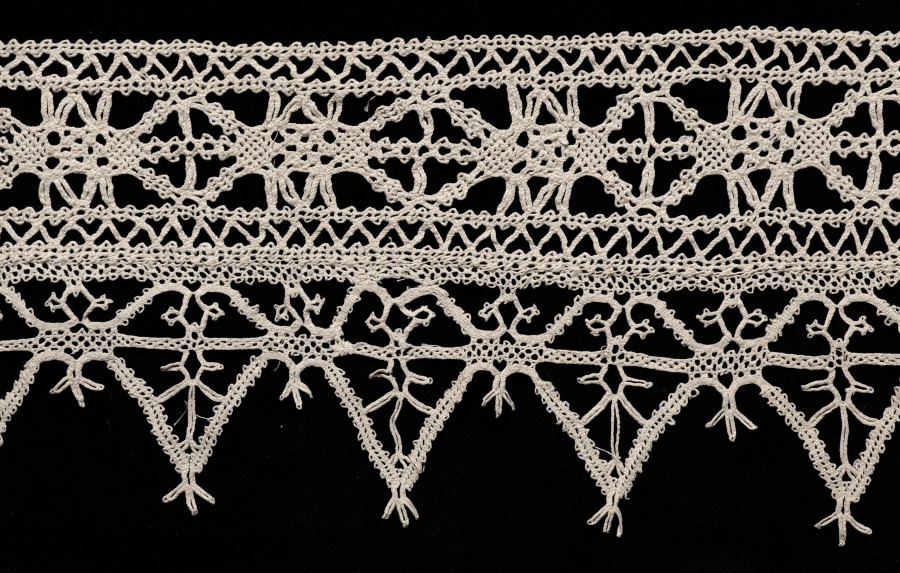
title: Lace Insertion and Edging of Points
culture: Italy, Venice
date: 1500s–1600s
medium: Bobbin lace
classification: Lace